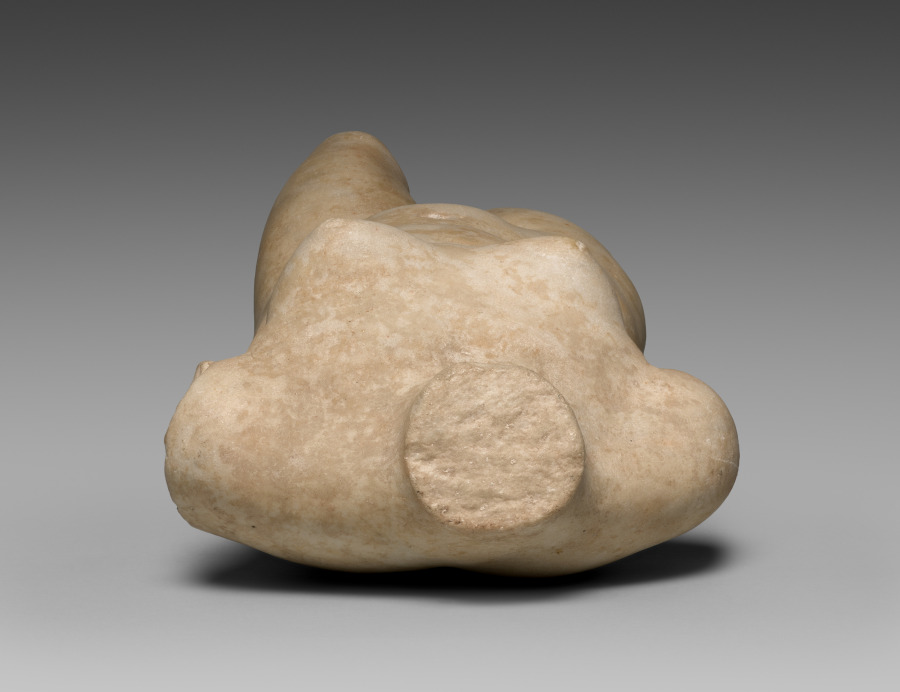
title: Torso of a Woman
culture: Italy, Roman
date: 100 BCE–400 CE, or modern, before 1927?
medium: marble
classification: Sculpture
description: Even without her head, limbs, or additional attributes, the nudity of this female statuette connects her to Aphrodite, goddess of love, or Venus, her Roman parallel. Female nudity was first realized in large scale in the mid-300s BC by the famous Athenian artist Praxiteles (395–330 BC), whose sculpture of Aphrodite was prominently displayed in a shrine in the city of Knidos (in present-day Turkey). For centuries thereafter, the female nude became a great favorite for Greek and Roman artists. The tradition continued into modern times, leading some to question the ancient origins of this sculpture.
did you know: The nudity of this female statuette connects her to Aphrodite or Venus, goddess of love.